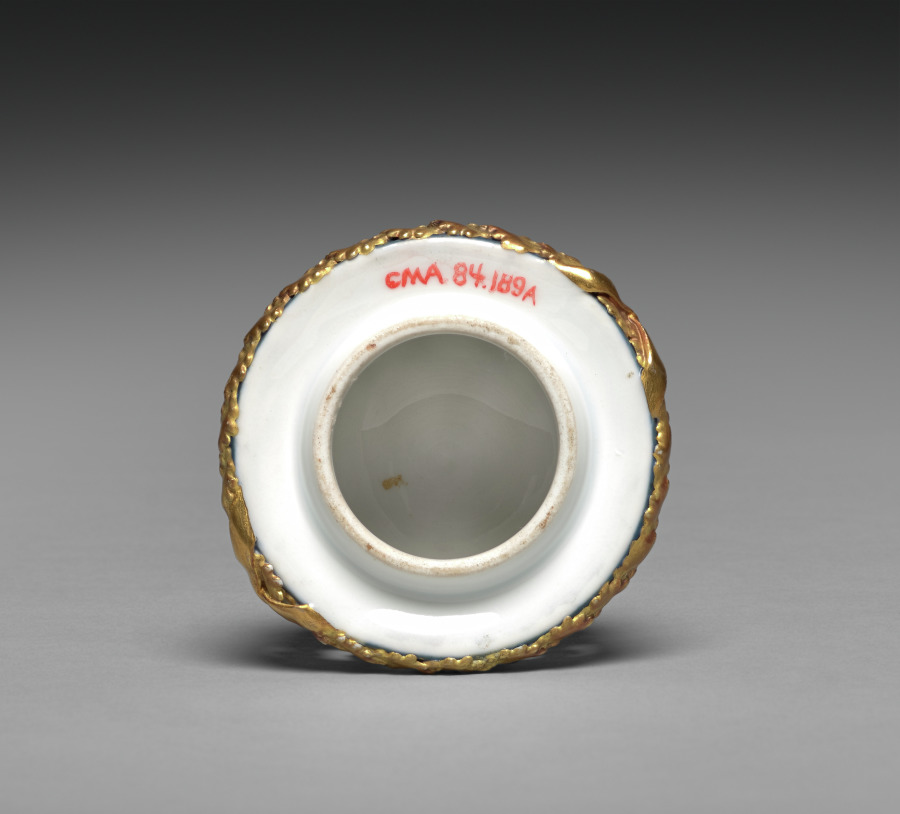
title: Cover for a Vase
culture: Germany, 19th century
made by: Meissen Porcelain Factory (German, est. c. 1710)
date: 1881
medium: porcelain with pâte-sur-pâte decoration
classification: Ceramic